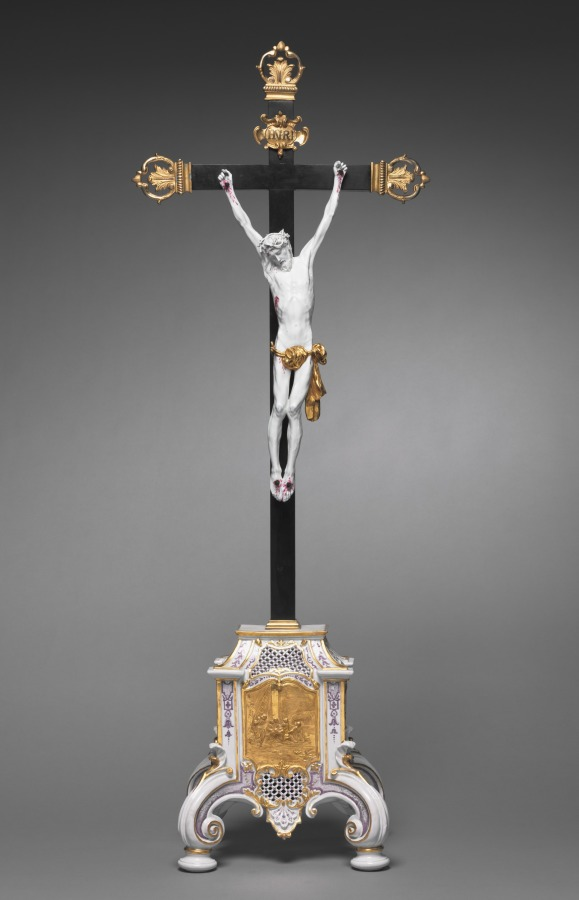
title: The Crucifixion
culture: Austria, Vienna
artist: Du Paquier Porcelain Manufactory (Austrian, active 1719–1864)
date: c. 1730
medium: porcelain, ebonized wood cross with gilt bronze mounts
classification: Ceramic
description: The second oldest European porcelain factory after that at Meissen (in Germany) was set up in Vienna in 1716. During its early years, the Vienna factory was privately owned by a court official, Claudius Innocentius Du Paquier, and its early wares—made before 1744—carry his name. They are characterized by energetic shapes, strong colors, and the use of gold for surface decoration. This is the only Du Paquier crucifix known today. The figure of Christ closely resembles the work of Vienna's most famous sculptor, Georg Raphael Donner (1693–1741), and was probably created by one of his followers especially to be used on this crucifix. The anatomical accuracy and precise detail of the figure, along with the abundance of gold decoration, indicate that the piece was probably a special commission intended for a distinguished patron, possibly a member of the Hungarian Esterházy family.